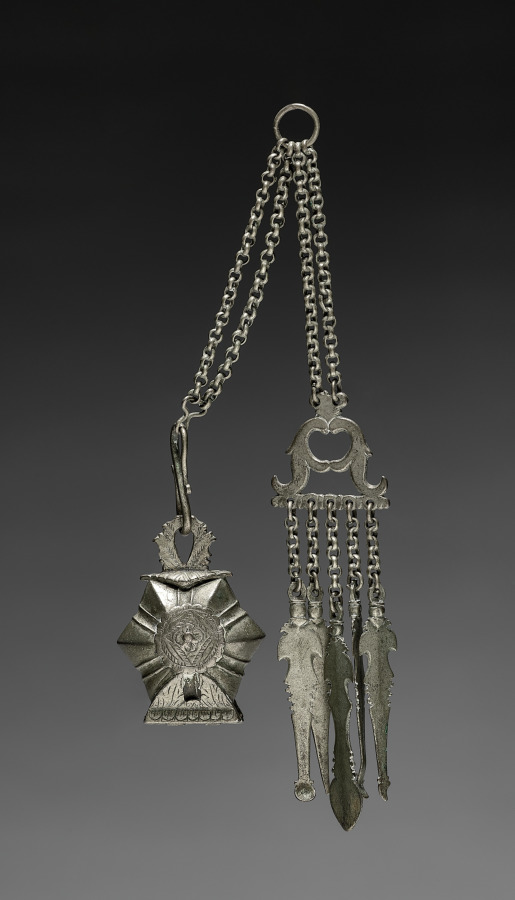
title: Betel-nut Holder and Chatelaine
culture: Burma (?)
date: 1800s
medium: silver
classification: Jewelry